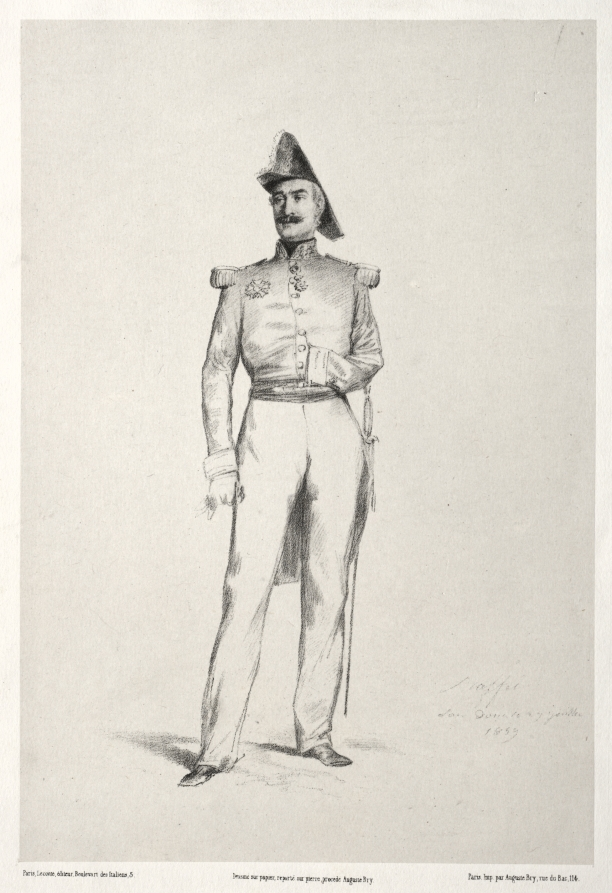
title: La Maréchal Baraquey d'Hilliers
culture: France, 19th century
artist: Auguste Raffet (French, 1804–1860)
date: 1859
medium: lithograph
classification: Print